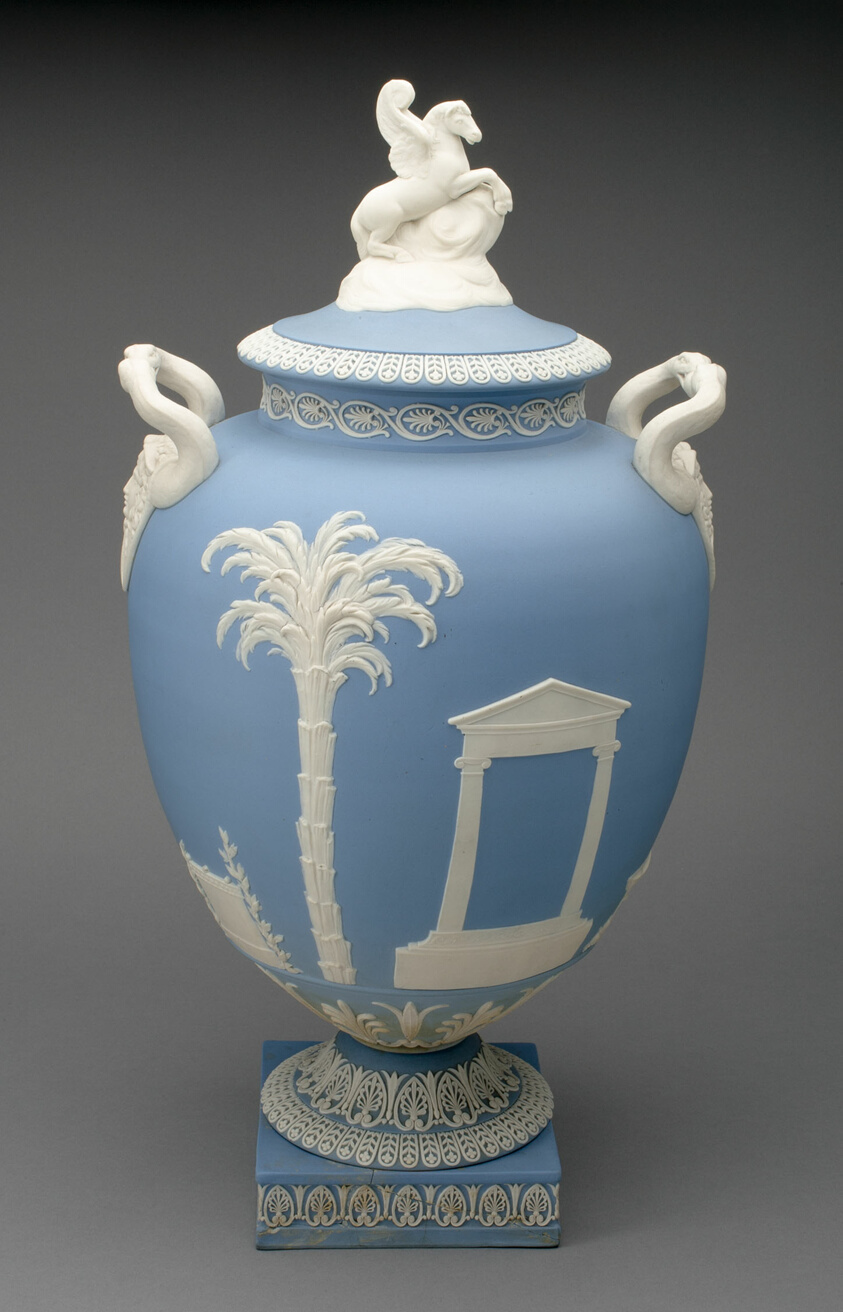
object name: Ceramics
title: Vase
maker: Wedgwood Manufactory (England, founded 1759)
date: c. 1860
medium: Stoneware (jasperware)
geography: Burslem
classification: vase; vessel; ornamental piece; stoneware; european decorative arts; ceramics